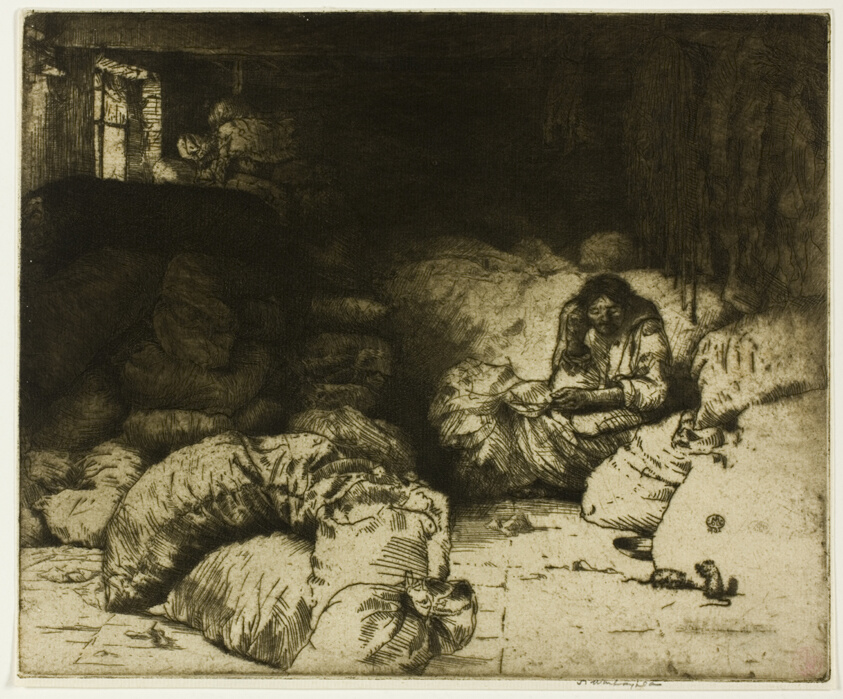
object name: Print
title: The Sleeping Rag Vendor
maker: Donald Shaw MacLaughlan (American, born Canada, 1876-1938)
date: 1902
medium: Etching in black on cream laid paper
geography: United States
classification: etching; print; prints and drawing